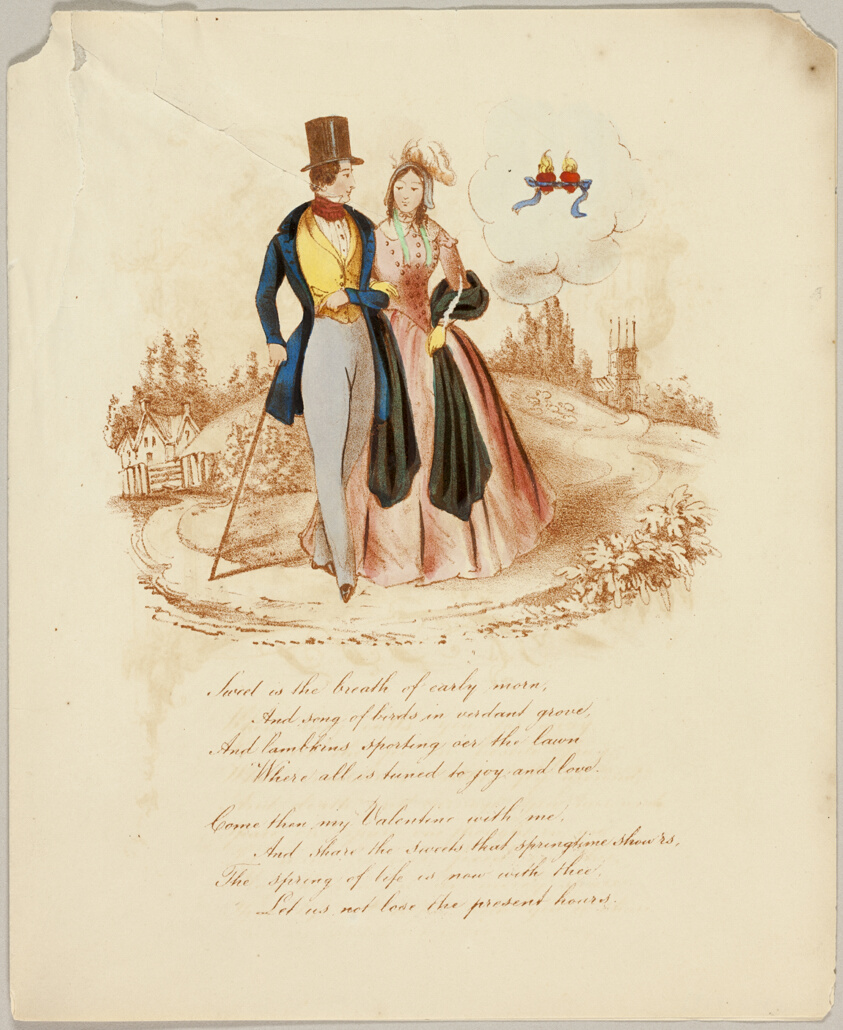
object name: Print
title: Sweet is the Breath of Early Morn (valentine)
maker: Unknown Artist; English, 19th century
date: c. 1842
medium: Lithograph in brown ink with hand-coloring on cream wove paper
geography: England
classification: valentine; prints and drawing; print